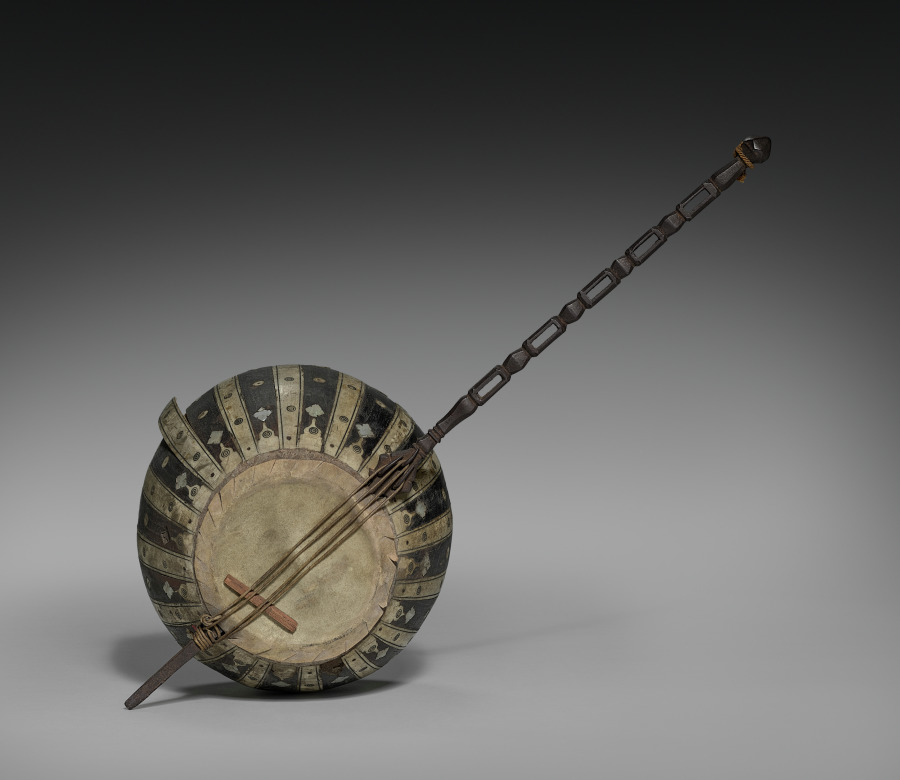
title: Kamānche (incomplete)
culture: Northern Iran (Caucasian, maybe Azerbaijan, or Kashmir)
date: 1875–1900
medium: Wood, hide, and bone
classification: Musical Instrument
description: Kamānche is a Persian term first used in the 10th century to describe an instrument that is sounded with a bow. From there, bowed instruments spread to Byzantium, Central Asia, the Far East, and then to Europe. In Egypt, it is known as the rabāb, a term known throughout the Islamic world from North Africa to Southeast Asia. The names of musical instruments often reveal origin, context, or musical function. In Europe, North Africa, and Asia where contact with Middle Eastern culture occurred, variations of Arabic and Persian terms for instruments are widespread. Usually, related names refer to similar instruments; however, this is not always true. Among these "floating terms" are the names zūrna, rabāb, kāmanja, nāy, and dombak.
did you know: The instrument's spike would be placed on the ground or today, on the knee, when it was played.